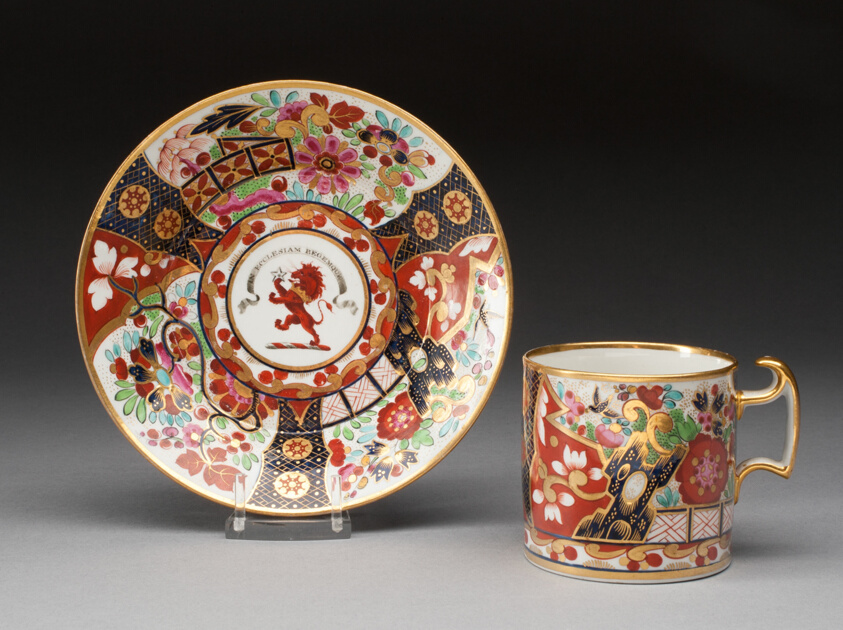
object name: Ceramics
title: Coffee Cup and Saucer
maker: Worcester Porcelain Factory (Barr, Flight & Barr Period, 1804–1813); Worcester, England, founded 1751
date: 1804–1813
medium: Soft-paste porcelain with polychrome enamels, gilding, and armorial decoration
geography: Worcester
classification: drinking vessel; porcelain; ceramics; european decorative arts